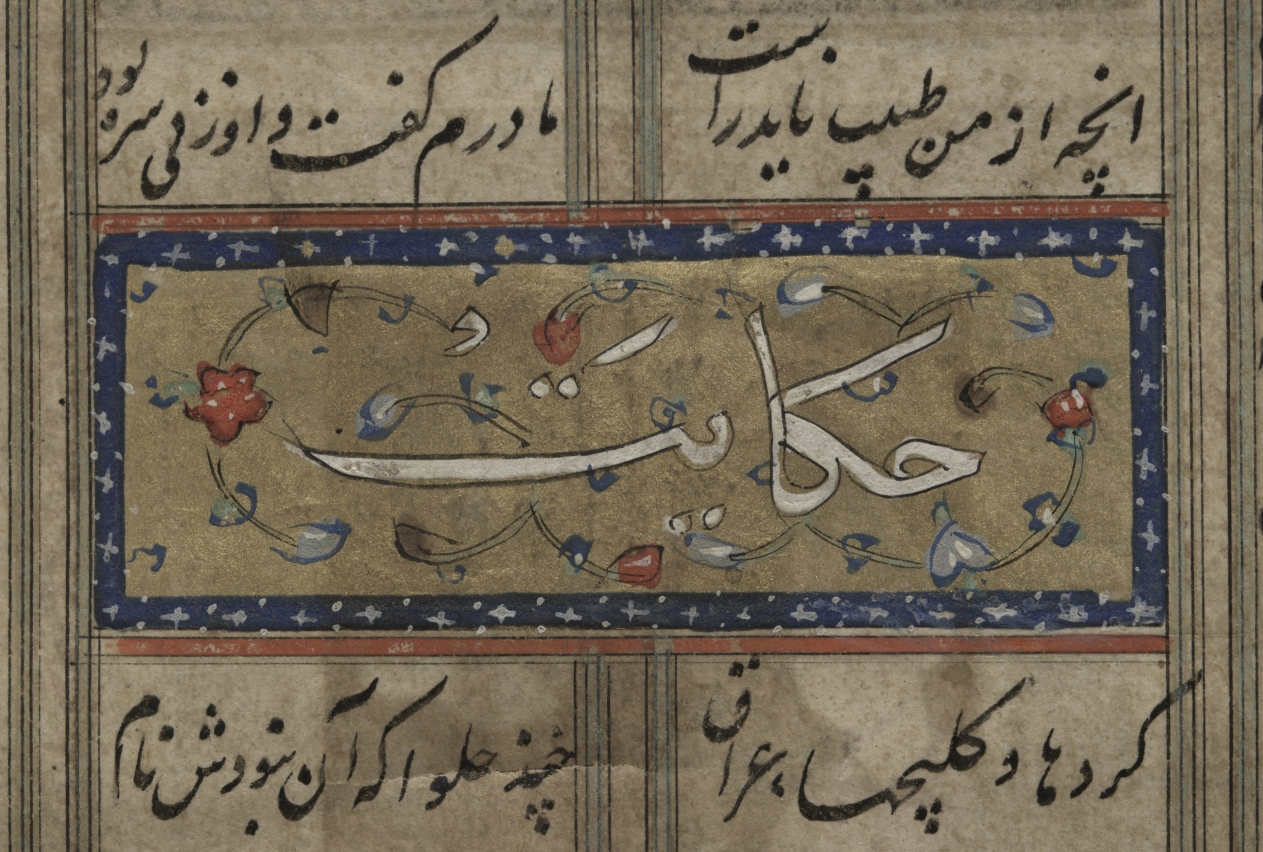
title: Text in Khamsa of Nizami (verso), from a Haft Paykar (Seven Portraits) of Nizami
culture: Iran, Shiraz, Safavid period (1501-1722)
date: c. 1560–80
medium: opaque watercolor, ink, and gold on paper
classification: Manuscript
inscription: Script: Nasta'liq